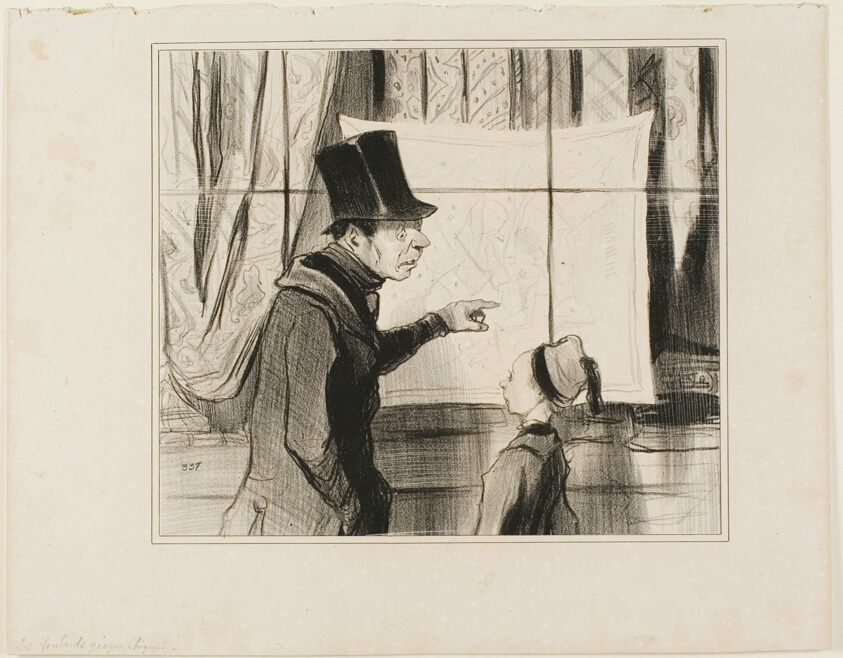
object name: Print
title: Geogaphic Scarves. "Look Dodolphe, this is really the last sacrifice I'll do for your education... if you still don't get your geography right, it means you are completely clogged up... this time I'll stick your nose into it. To start with, you'll just need to make sure during the first day to only blow your nose in Normandy.... I'll slap you in the face if you blow your nose in the Channel!," plate 89 from Actualités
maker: Honoré Victorin Daumier; French, 1808-1879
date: 1842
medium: Lithograph in black on ivory wove paper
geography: France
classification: lithograph; print; prints and drawing